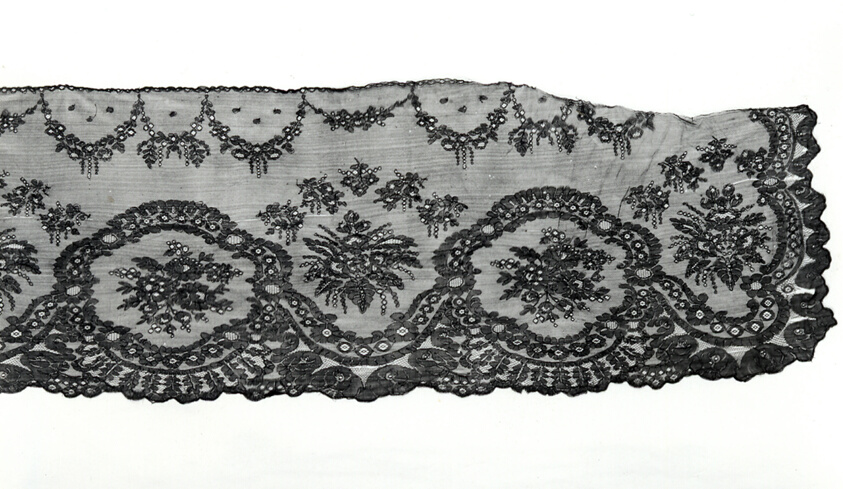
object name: Textile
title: Flounce (Incomplete)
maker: England or France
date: 1850/75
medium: Silk, warp frame machine lace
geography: England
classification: textile; lace - machine